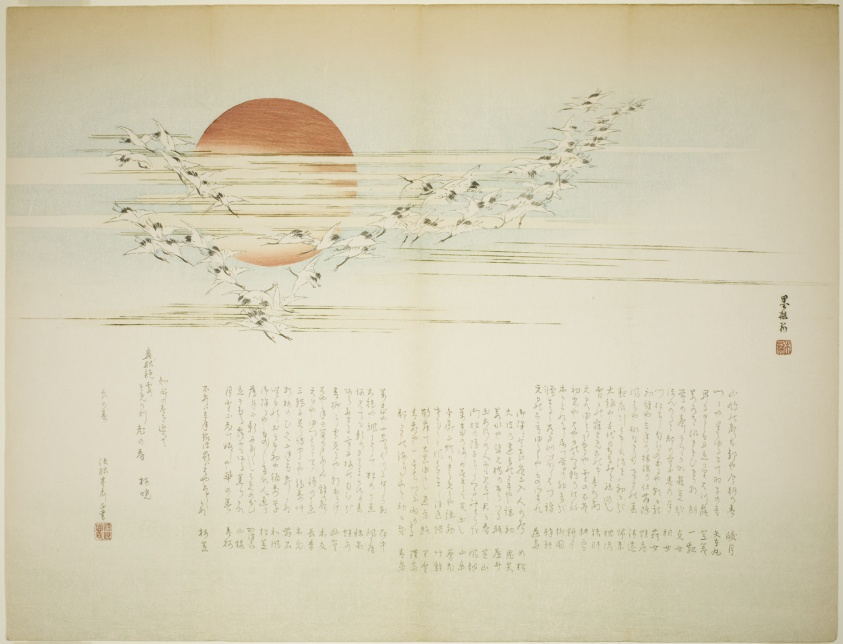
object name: Print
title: Multitudes of Cranes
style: Japanese (culture or style)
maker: Bokushin (Japanese, active 19th century)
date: spring 1863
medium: Color woodblock print; surimono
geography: Japan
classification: woodblock print; print; asian art